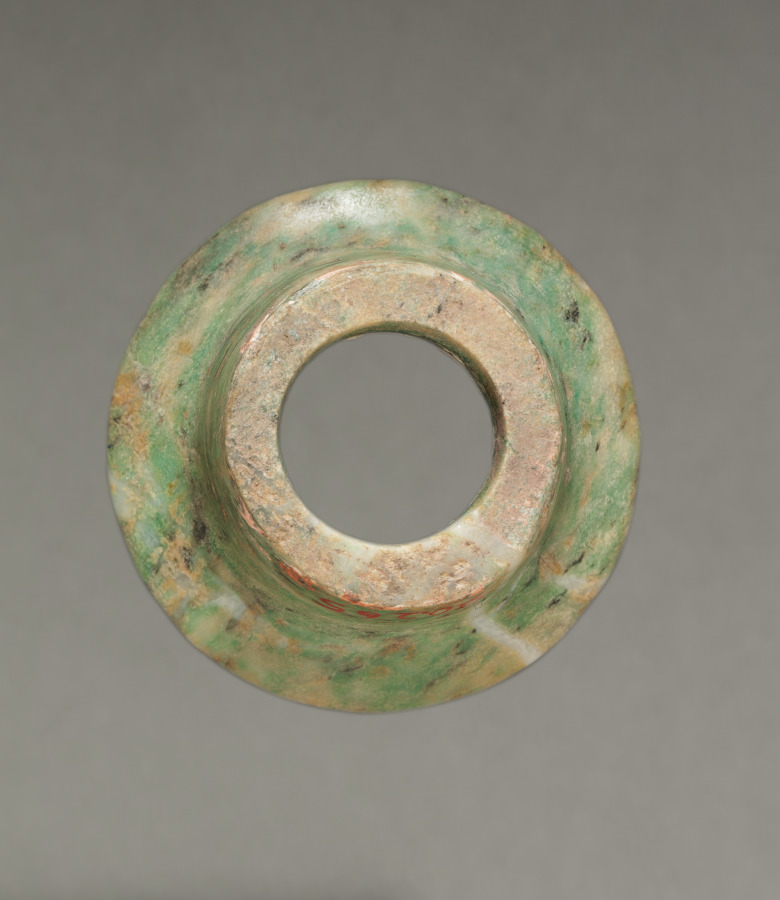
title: Ear Ornament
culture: Central Mexico, Teotihuacán style, Classic period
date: 150–200 CE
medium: jadeite-albitite(?)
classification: Sculpture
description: Near Teotihuacán's largest palace is a small temple gorgeously ornamented with green-feathered serpents, symbols of the earth's fertility. Beneath the temple lie at least 120 human sacrifices, most men, many warriors, and some wearing greenstone ornaments like these, perhaps a set. The sacrifices, apparently laid out to mark the cardinal directions, may have consecrated the temple or a ruler's tomb, or both.